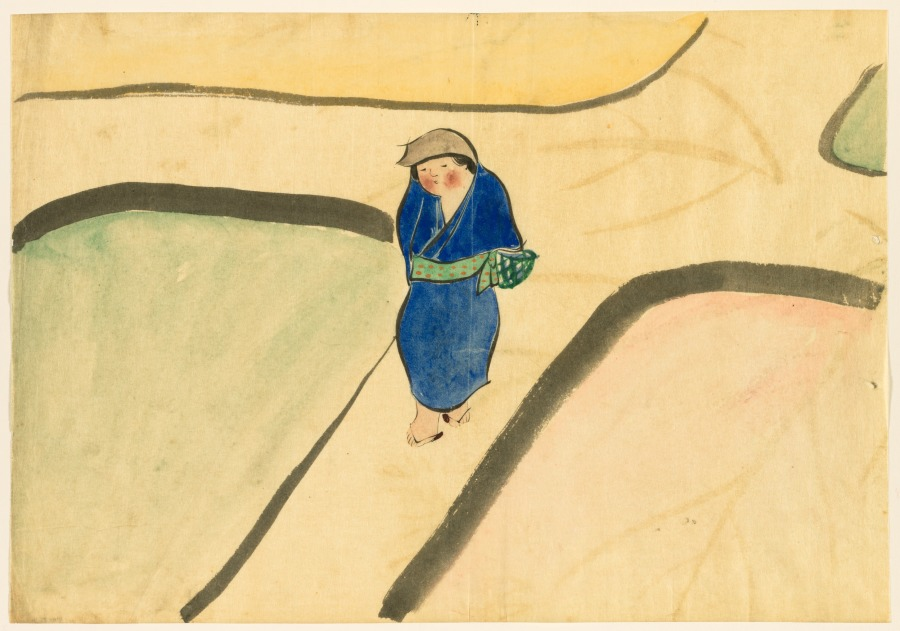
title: Flowers of a Hundred Worlds (Momoyogusa): Spring Field (Haru no tanomo)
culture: Japan, Meiji period (1868–1912)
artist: Kamisaka Sekka (Japanese, 1866–1942)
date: 1909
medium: ink and on paper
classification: Drawing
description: Kamisaka Sekka made preparatory drawings for his Flowers of a Hundred Worlds series on tracing paper with ink and color. The freehand sketches are much looser than the finished, printed compositions.